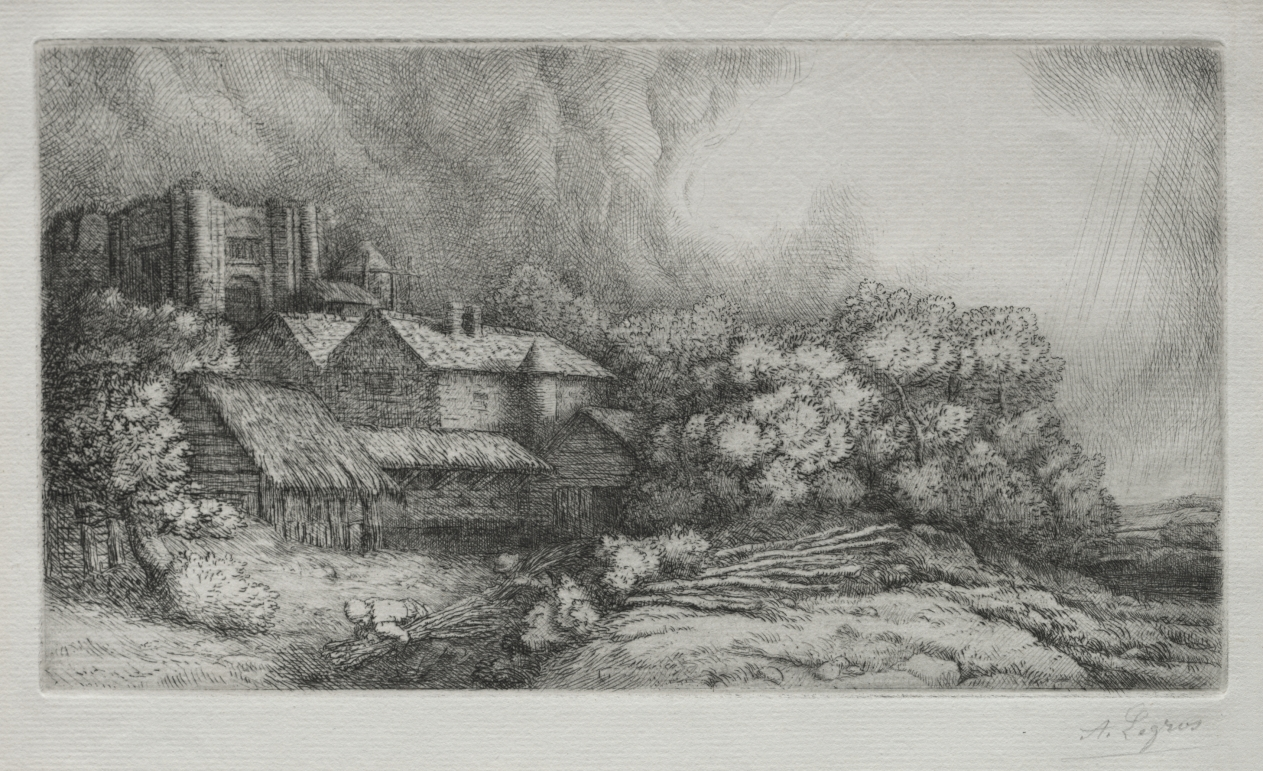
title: The Abbey Farm (La Ferme de l'abbaye)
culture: France, 19th-20th century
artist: Alphonse Legros (French, 1837–1911)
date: c. 1893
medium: etchingand drypoint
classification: Print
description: A prolific etcher, Legros played an active role in the French etching revival of the 1860s. Humble, rural landscapes peopled by farmhands and peasants were the subjects of many of his works. After forging a friendship with James Abbott McNeill Whistler, Legros left Paris and moved to London, where he became naturalized in 1880. In Legros’s work, French and English sensibilities merged. In The Abbey Farm, the softness of the rain and the stillness of the abbey farm are accentuated by the delicacy of Legros’s etched lines.